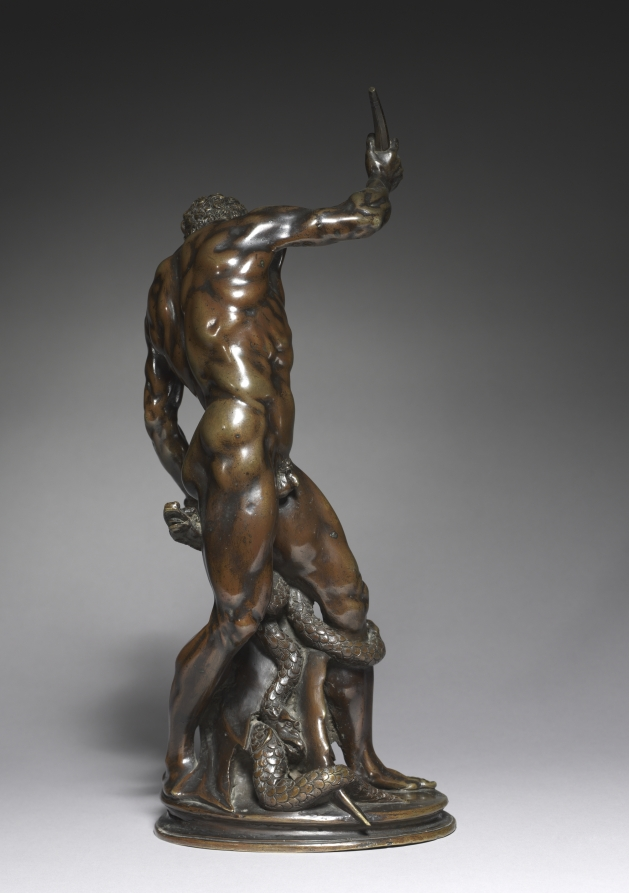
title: Hercules and the Hydra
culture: Northern Europe, late 16th-early 17th century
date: late 1500s-early 1600s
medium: bronze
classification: Sculpture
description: Hercules slayed the Lernean Hydra as the second of the ancient hero’s twelve labors. When one of the nine snake-like heads was destroyed, two grew back. Hercules cauterized each stump, allowing him eventually to kill the monster. The object he holds may have been a club, sword, sickle, or torch. The sinuous, scaly Hydra and the defined musculature presented challenging opportunities for sculptors working in bronze. The raw, tumultuous energy and twisting form-associated with artists of the late 1500s-contrasts to Jacopo Sansovino’s earlier Virgin and Child (1951.316).